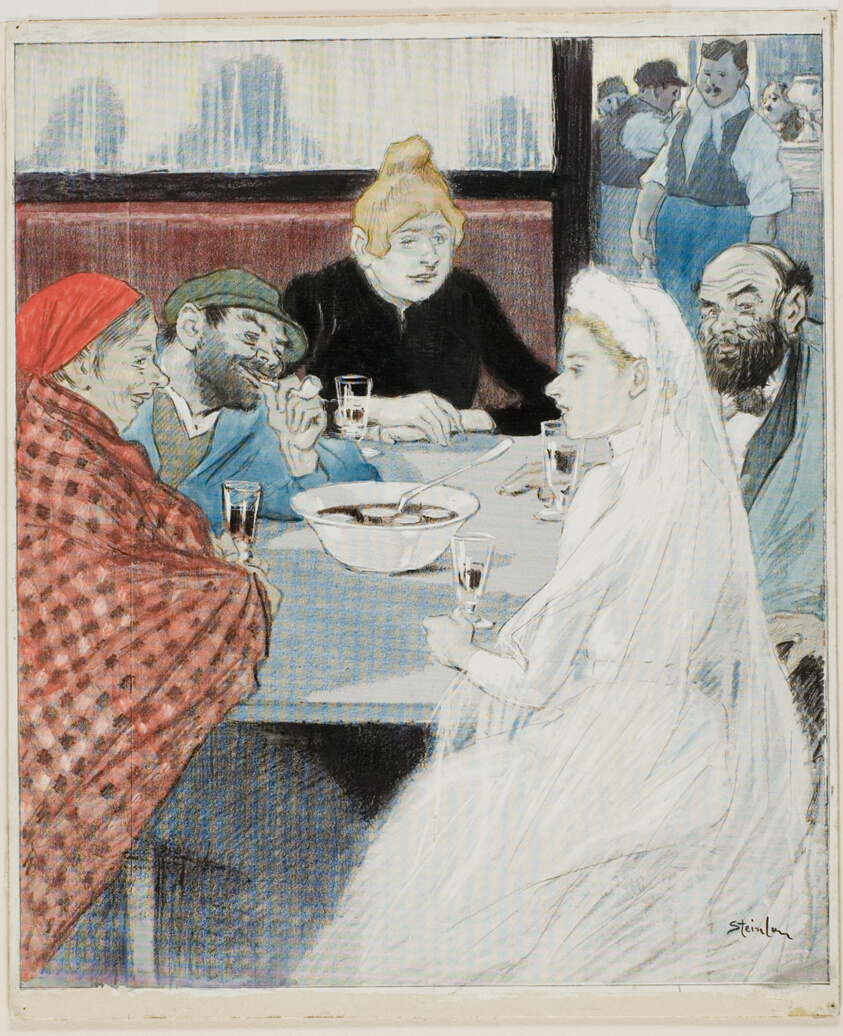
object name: Drawing and Watercolor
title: The Bride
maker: Théophile-Alexandre Steinlen; French, born Switzerland, 1859-1923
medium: Drawing with scraping, hand-coloring in watercolor/gouache and black ink with graphite additions on white Gillot paper (papier Gillot: a white coated paper covered with a very fine pattern of black horizontal stripes and ridges used to produce a Gillotage) laid down on ivory board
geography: France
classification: drawings (visual works); prints and drawing